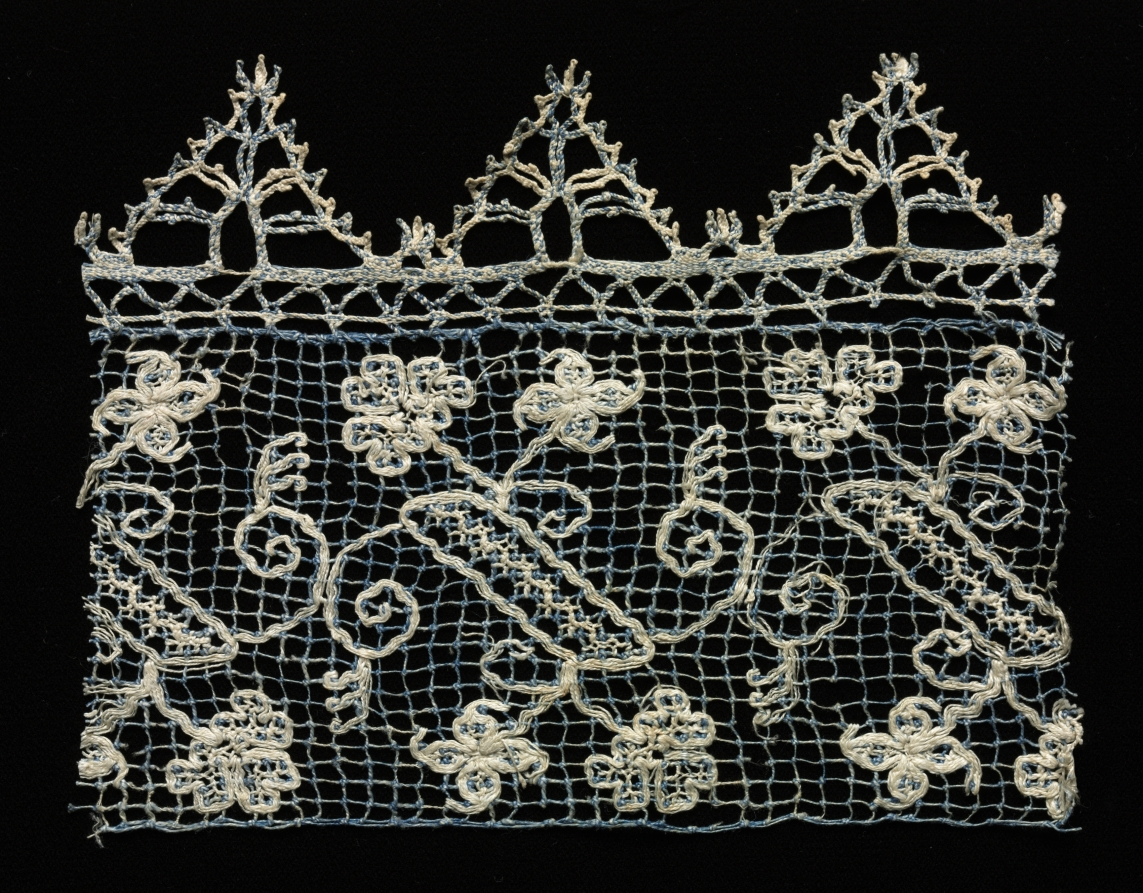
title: Fragment of a Border with Vines and Floral Motifs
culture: Italy, 1600s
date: 1600s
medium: Bleached and blue dyed linen (est.): needle lace, filet/lacis (knotted ground and darned in one direction) and bobbin lace edging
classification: Lace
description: The light blue ground of this fragment of lace, together with the varying thicknesses of threads used for the ground and the embroidered pattern, create a sense of depth in the textile. The white thread is bleached linen and the blue is linen that has been bleached and dyed.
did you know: The word lace derives from the Latin laqueus, meaning noose.